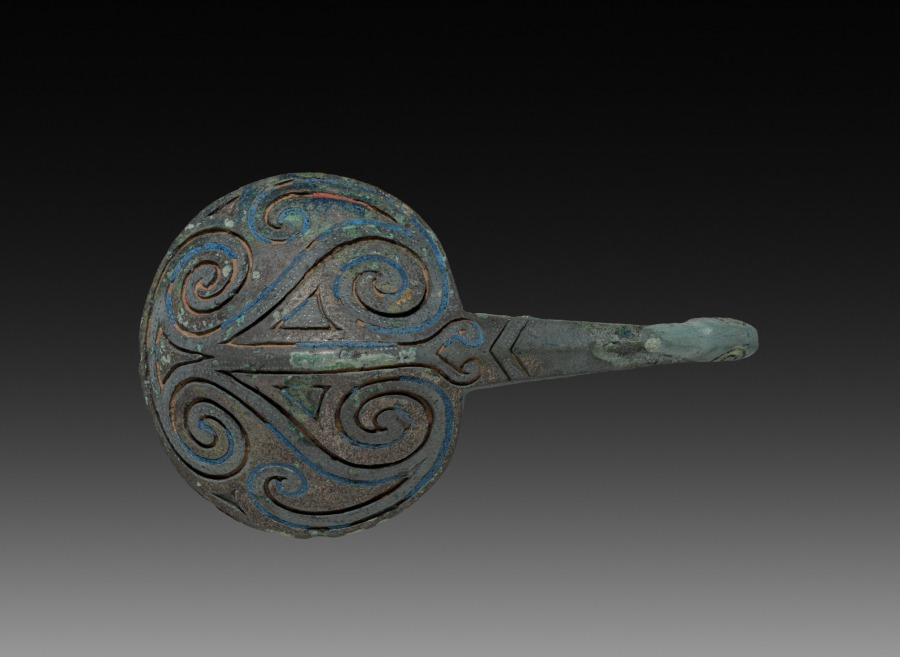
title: Belt Hook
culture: China, Eastern Zhou dynasty (770–256 BCE)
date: late 500s–early 400s BCE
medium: bronze inlaid with powdered azurite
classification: Metalwork